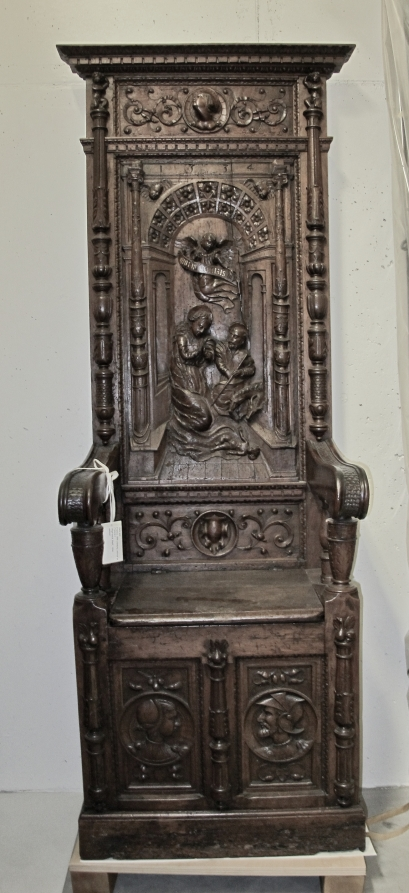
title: High-back Stall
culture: France, 16th century, period of Francis I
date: 1534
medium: walnut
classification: Furniture and woodwork